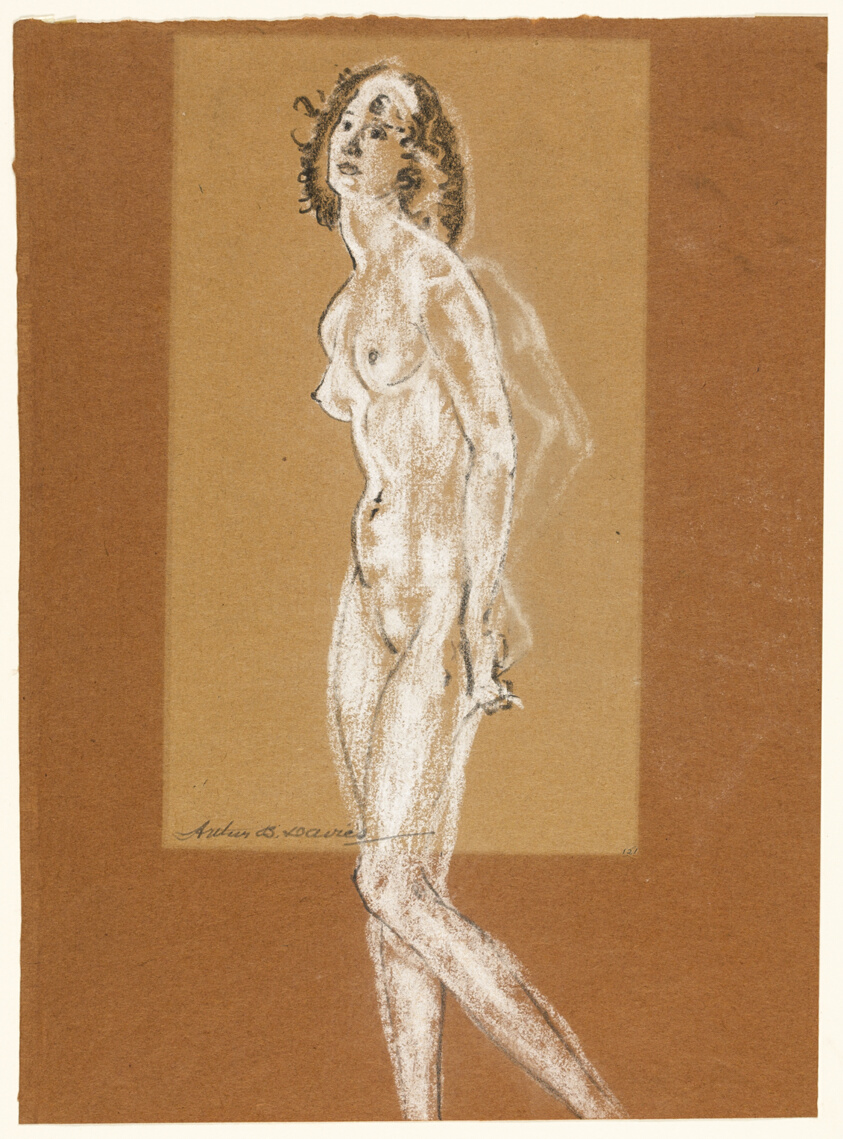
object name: Drawing and Watercolor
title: Standing Female Nude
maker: Arthur B. Davies (American, 1862-1928)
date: 1882/93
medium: Black crayon and white chalk on brown laid paper (partially discolored to tan)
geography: United States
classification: chalk; drawings (visual works); prints and drawing